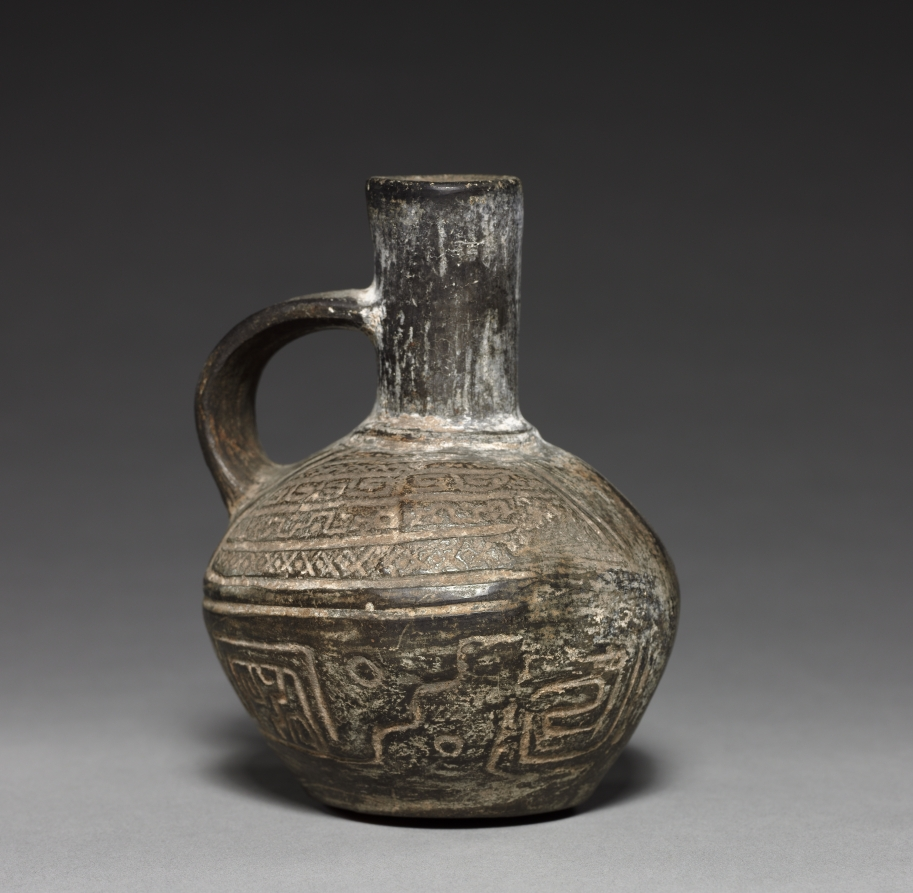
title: Bottle Vase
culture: Peru, Chimú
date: 1200–1400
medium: black ware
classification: Ceramic